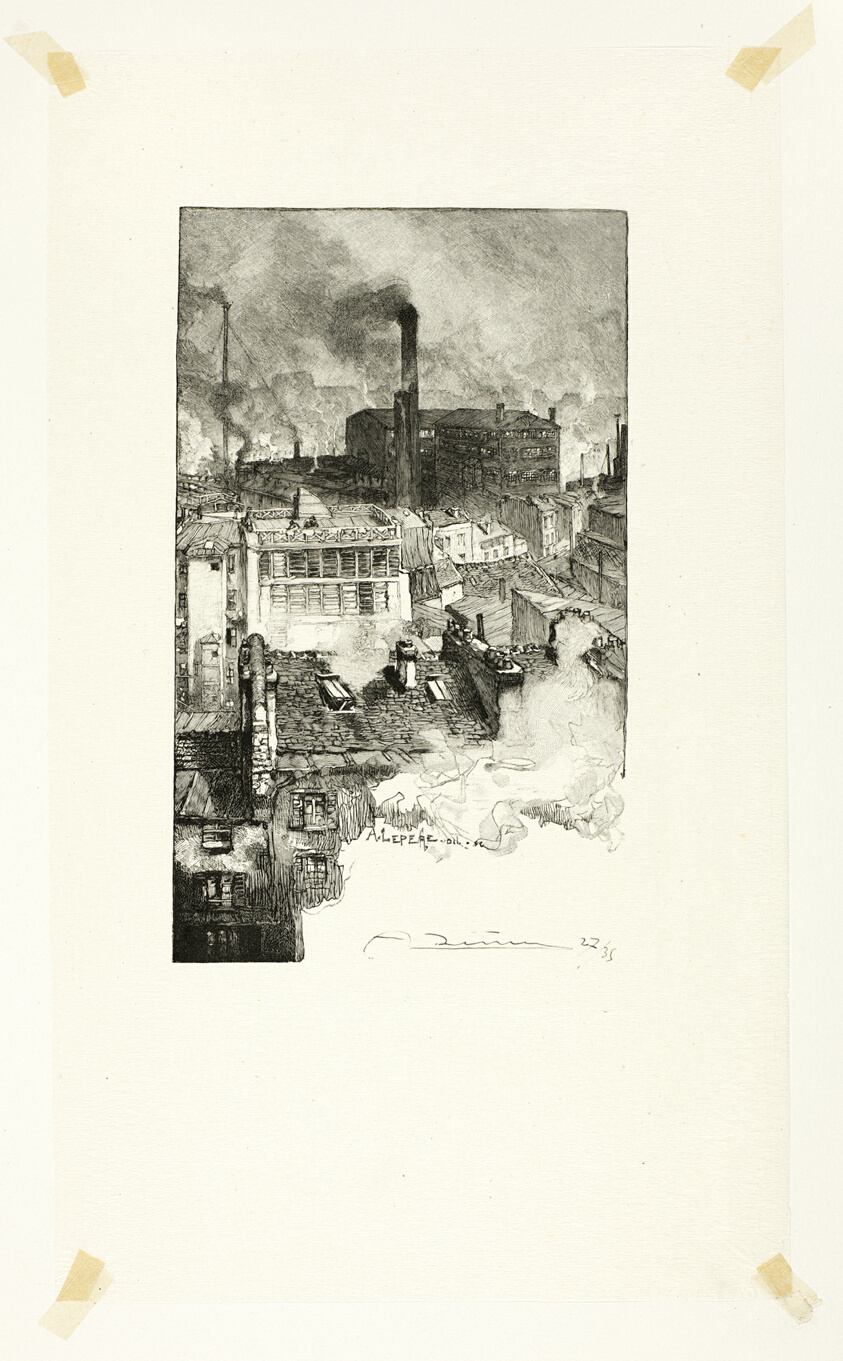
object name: Print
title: Quartier des Gobelins, plate 20 from Le Long de la Seine et des Boulevards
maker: Louis Auguste Lepère (French, 1849-1918); published by A. Desmoulins (French, active c. 1908-1910)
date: 1889, published 1910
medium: Wood engraving in black on cream Japanese tissue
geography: France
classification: wood engraving; paper; print; prints and drawing